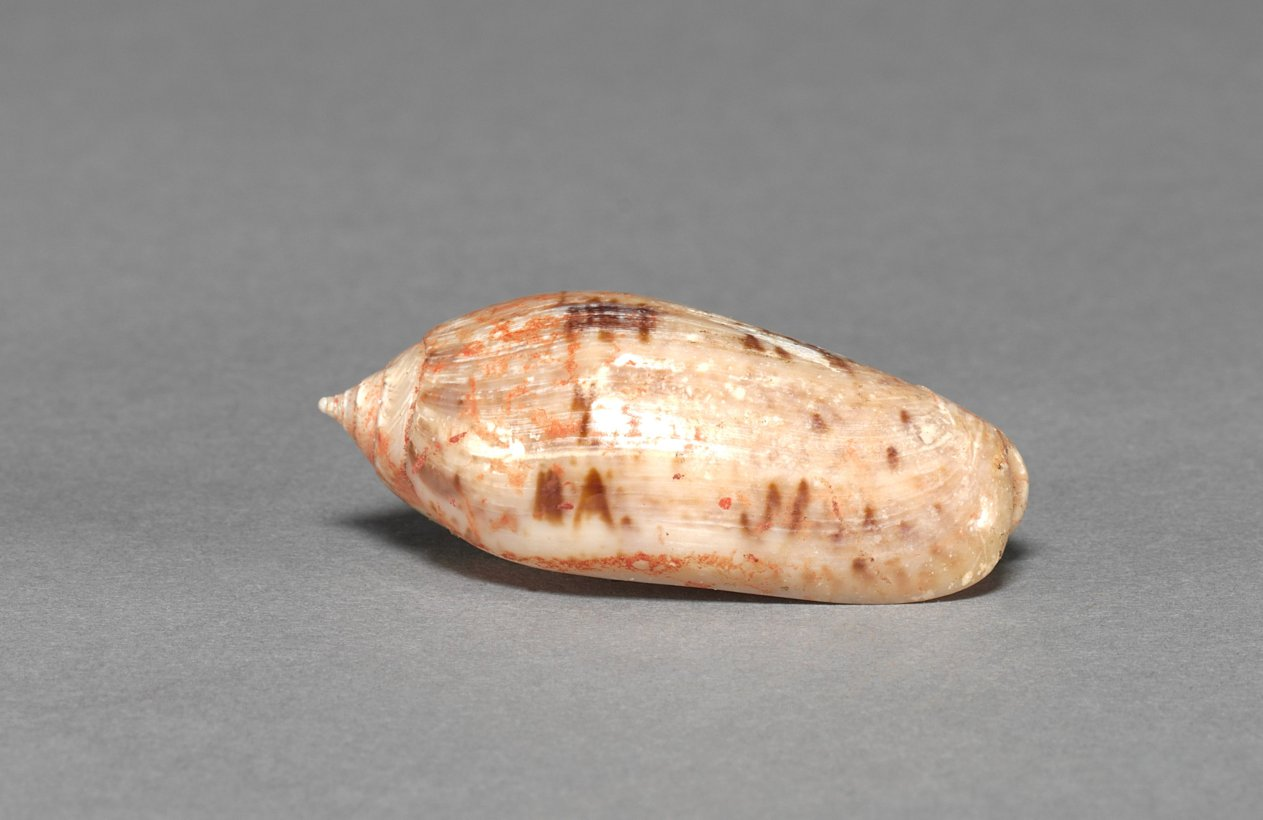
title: Offering Group: Small Shell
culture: Mexico, Guerrero(?), San Jerónimo de Juárez, Xochicalco style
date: c. 800–1200(?)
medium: shell, red pigment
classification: Sculpture